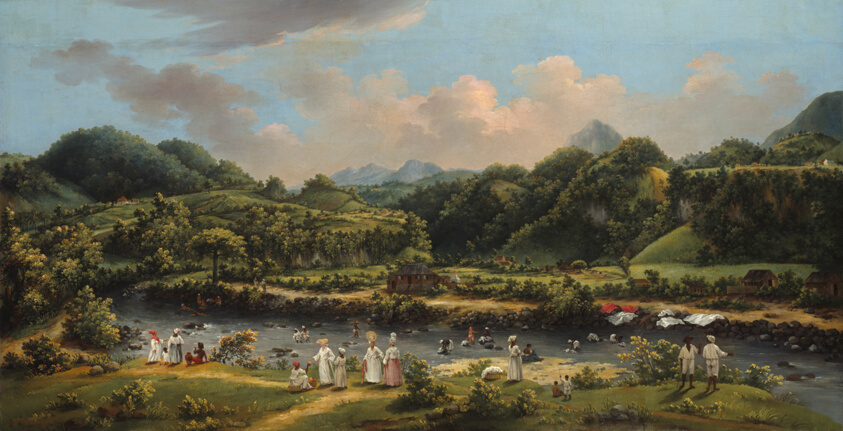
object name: Painting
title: View on the River Roseau, Dominica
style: 18th Century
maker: Agostino Brunias (Italian, active in England and the West Indies, 1758–96)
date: 1770/80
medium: Oil on canvas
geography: United Kingdom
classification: oil on canvas; oil paintings (visual works); paint; Italian; painting; european painting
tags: colonialism, African, caribbean, children, clouds, figures, labor, landscape, men, mountains, poverty, river, sky, slavery, trees, village, wealth, women